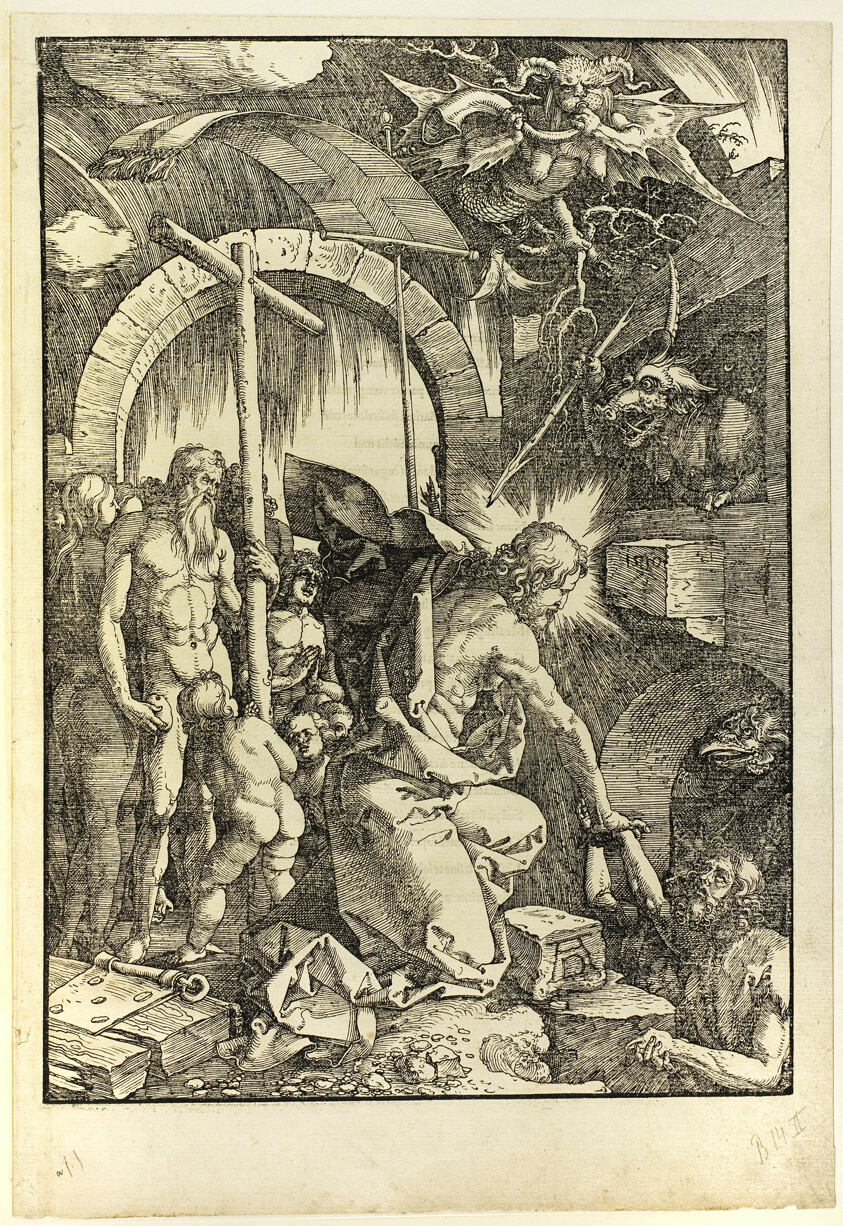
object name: Print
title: The Harrowing of Hell, from The Large Passion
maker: Albrecht Dürer (German, 1471-1528)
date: 1510, published 1511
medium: Woodcut in black on ivory laid paper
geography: Germany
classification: woodcut; print; prints and drawing; paper